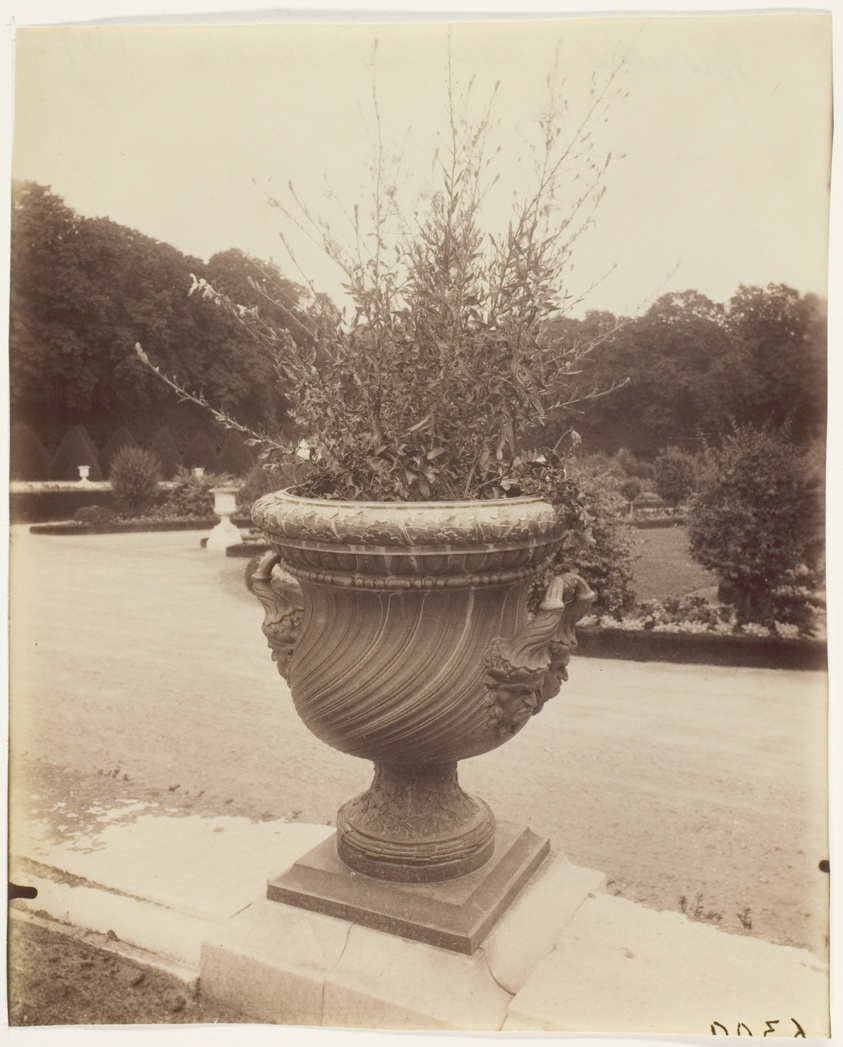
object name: Photograph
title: Versailles, Vase par Ballin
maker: Jean-Eugène-Auguste Atget (French, 1857–1927)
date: 1902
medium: Albumen print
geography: France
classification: albumen silver print; photographic process; photography; photograph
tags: Collected by Hugh Edwards